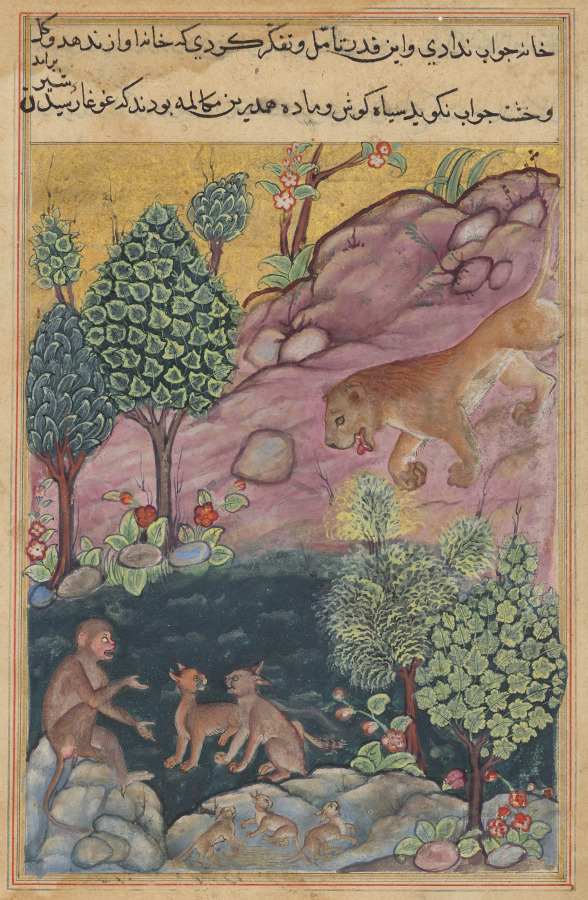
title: The lion returns to his territory and sees the monkey conversing with the lynx, from a Tuti-nama (Tales of a Parrot): Twenty-ninth Night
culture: Mughal India, court of Akbar (reigned 1556–1605)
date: c. 1560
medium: gum tempera, ink, and gold on paper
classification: Painting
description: The lion who rules the meadow returns from a journey to find that his home has been invaded by a family of lynx, who claim that they are its rightful owners. Although this painting depicts all of the animals together, in the text, the lion does not see the lynx and is easily tricked into believing they are fearsome creatures.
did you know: The monkey bares his teeth and gesticulates when he talks.